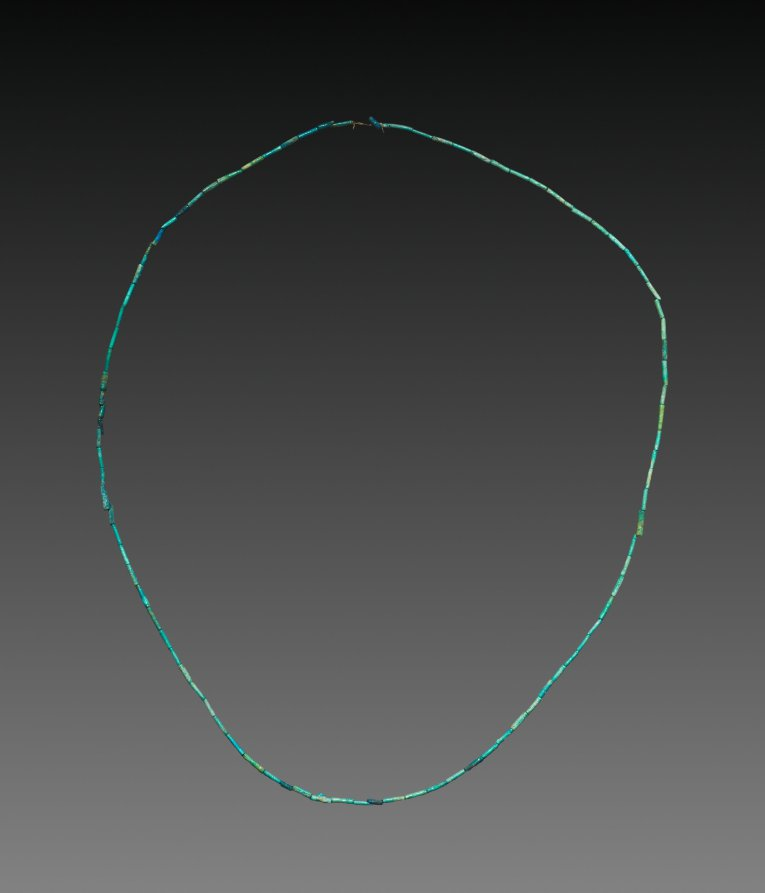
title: String of Mummy Beads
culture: Egypt, Late period (715–332 BCE)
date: 715–332 BCE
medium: faience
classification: Jewelry